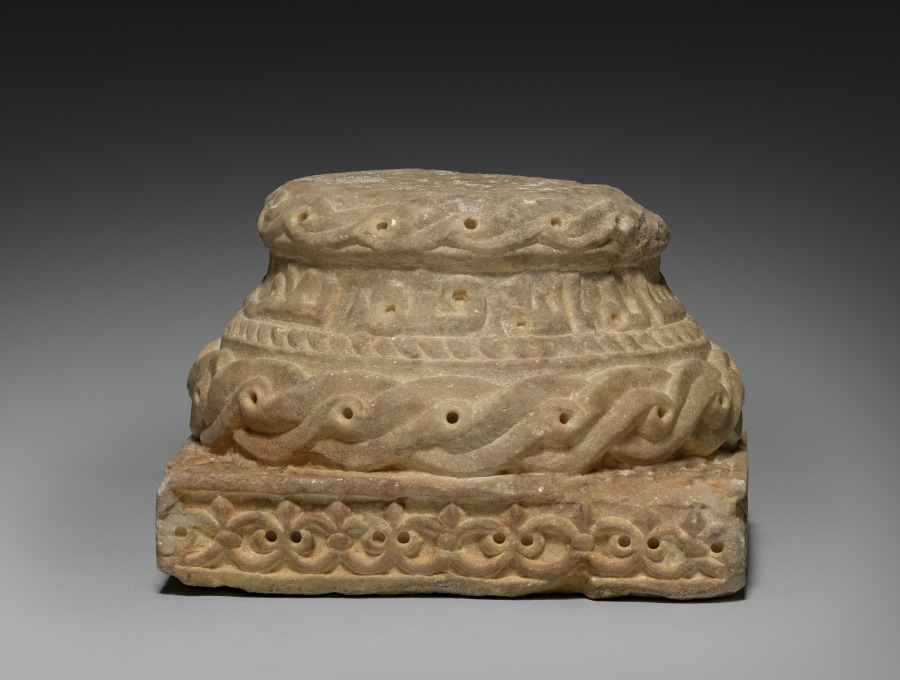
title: Column Base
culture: Spain, Cordoba, Spanish Umayyad period (756–1031)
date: c. 960–76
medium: Marble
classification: Sculpture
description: This base comes from the palatial city of Madinat al-Zahra near Cordoba (Spain) which was begun by caliph Abd al-Rahman III (r. 912–61) around 936. Large parts of the Iberian Peninsula were then under Islamic rule and experienced a cultural flowering. The city, destroyed already in 1010, was the most magnificent palace complex in Europe at the time.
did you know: In the mid-1800s the ruins of Madinat al-Zahra were rediscovered and the source of great fascination as people imagined a palace like that in the stories of 1001 Nights.